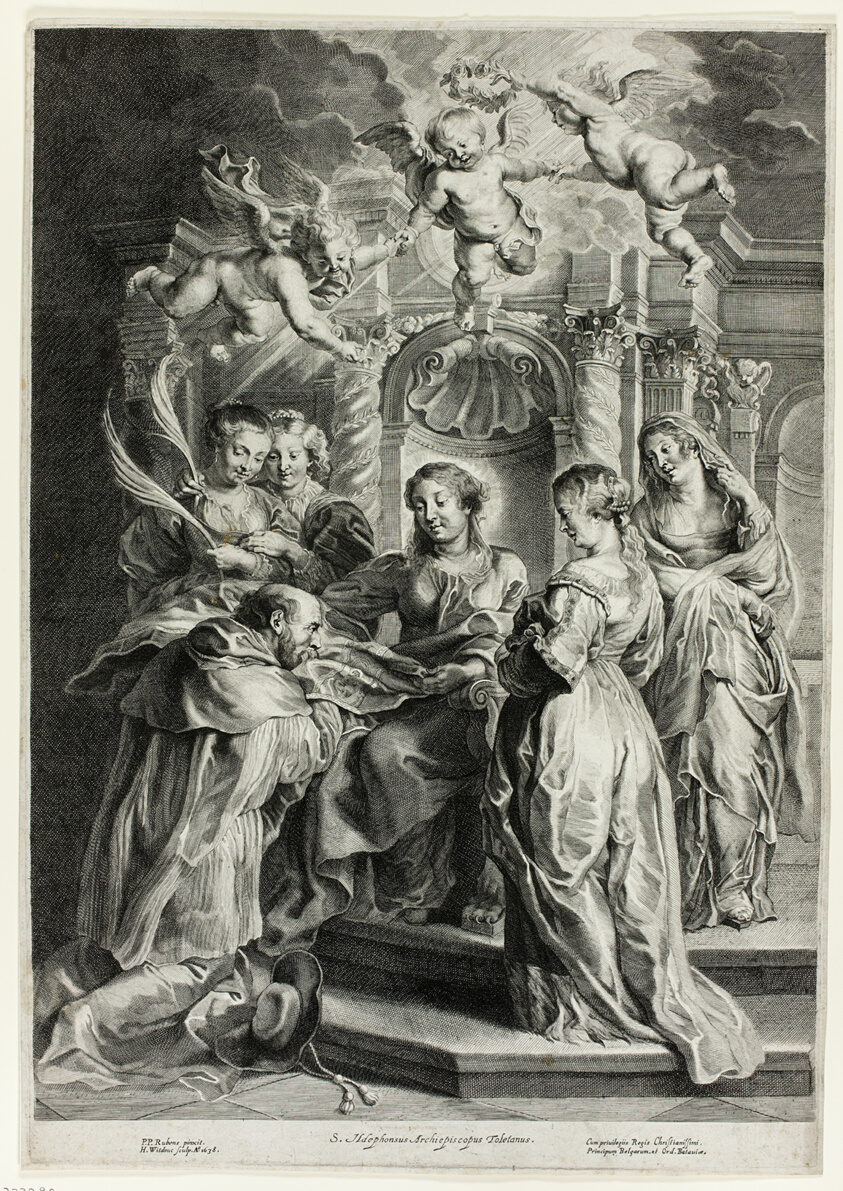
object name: Print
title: St. Ildefonso before the Virgin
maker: Hans Witdoeck (Flemish, 1615-after 1642); after Peter Paul Rubens (Flemish, 1577–1640)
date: 1638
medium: Engraving in black on ivory laid paper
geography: Flanders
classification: engraving; paper; print; prints and drawing